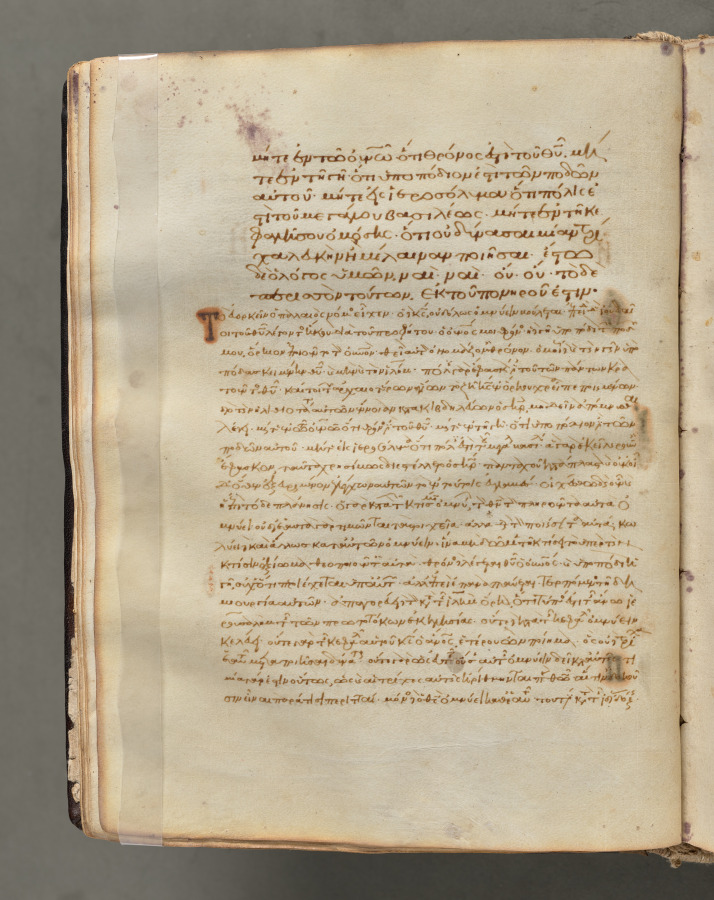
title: Text, folio 22 (verso), from a Gospel Book with Commentaries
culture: Byzantium, Constantinople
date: c. 1000–1100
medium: ink, tempera, and gold on vellum; leather binding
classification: Bound Volume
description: Each of the four gospels in this book opens on a page with brilliantly illuminated borders depicting the author of the text as well as birds-principally peacocks, symbols of the immortality of the soul-and fountains, representing the fountain of life and the salvation of the soul. This volume consists of 428 leaves with texts in Greek. Its level of sophistication suggests that it was probably written and decorated in a monastery in Constantinople.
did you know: Gospel Books were carried in procession through Byzantine churches.